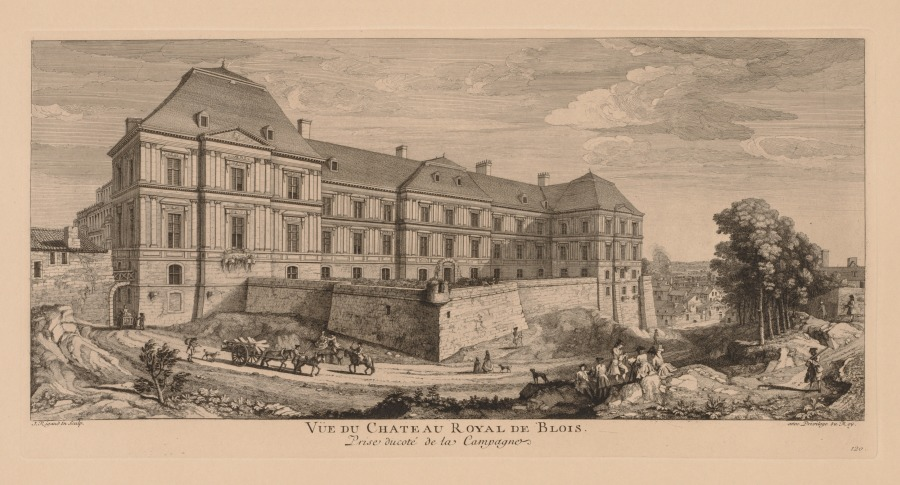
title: Vue du Château royal de Blois, prise du côté de la campagne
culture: France, 18th century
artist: Jacques Rigaud (French, 1681–1754)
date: c. 1720–50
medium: engraving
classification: Print